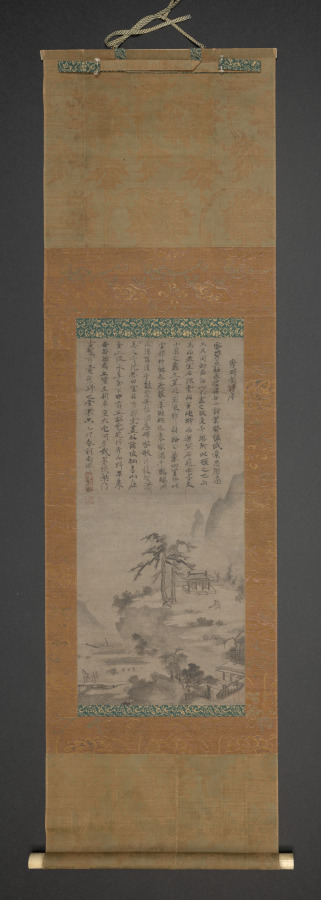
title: Shuyadō (Studio of Lofty Rusticity)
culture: Japan, Edo period (1615–1868)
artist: after Bunsei (Muncheong) (Japanese or Korean, active mid-15th century)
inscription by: after Chikuan Daien (Japanese, 1362–1439)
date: 1700s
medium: hanging scroll, ink on paper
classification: Painting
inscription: inscription by Chukuan Daien (Japanese, 1362-1439)m dated 1435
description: Hanging scrolls with assorted poems above and ink paintings below produced within Japan's Zen monastic community during the 1400s and 1500s are called poem-painting scrolls (shigajiku). This small painting was created much later in emulation of such works. While the original works often have a preface followed by poems by different monks, this composition has only a preface.